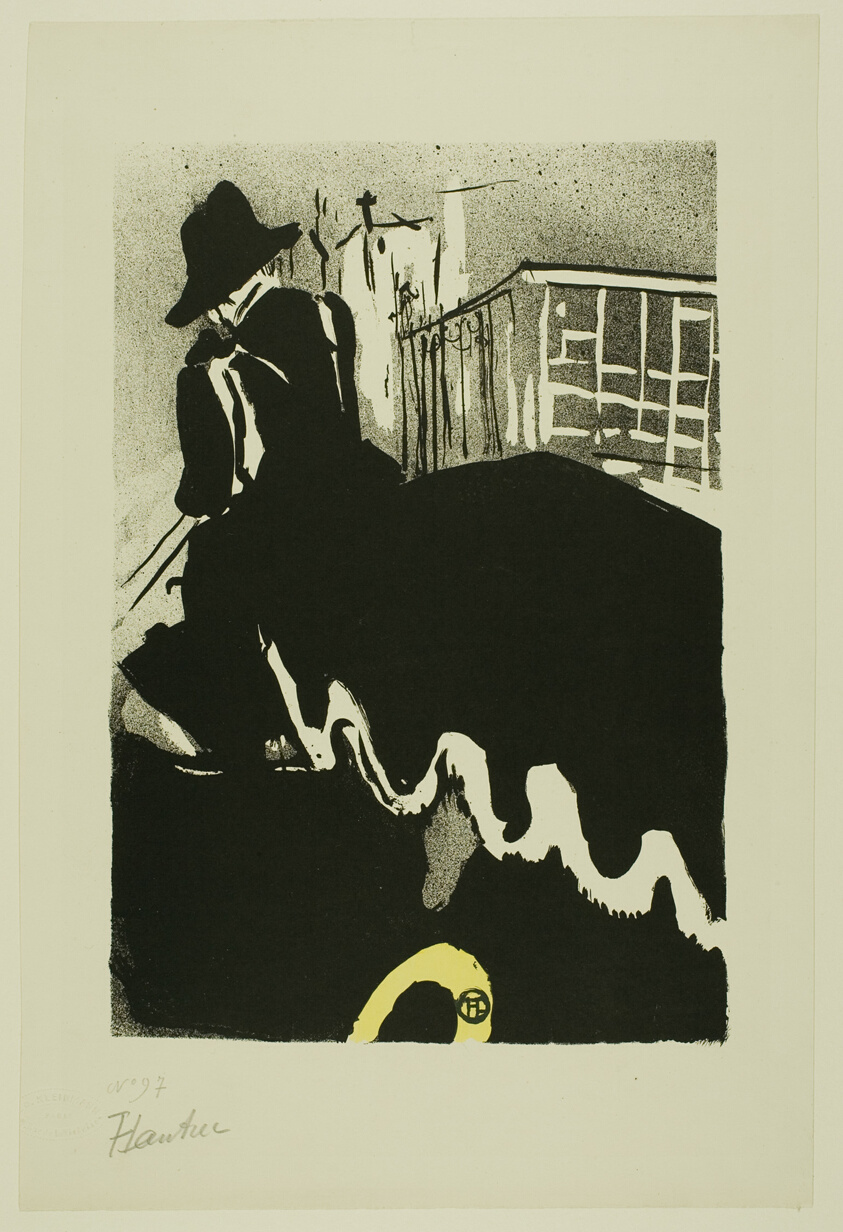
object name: Print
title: The Last Song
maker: Henri de Toulouse-Lautrec (French, 1864-1901)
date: 1893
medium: Color lithograph on cream wove paper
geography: France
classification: lithograph; print; prints and drawing